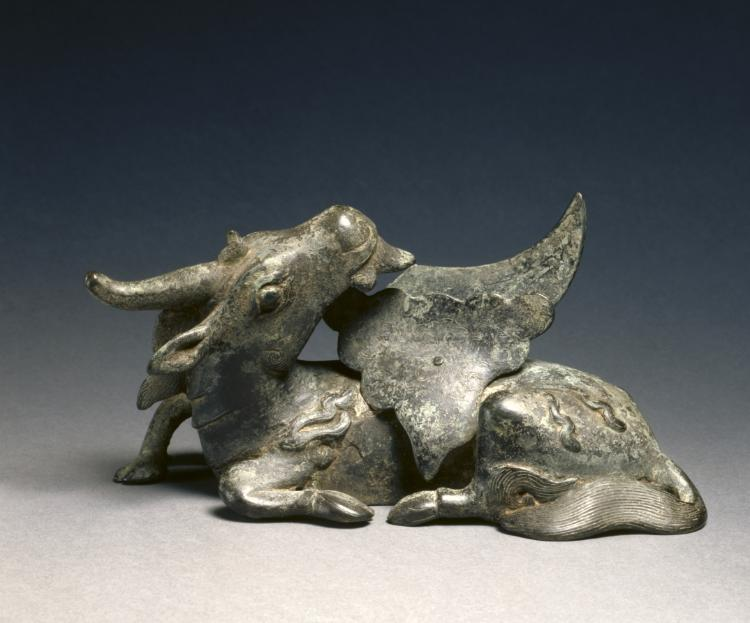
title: Mirror Stand in the Shape of a Djeiran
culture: China, Qing dynasty (1644-1911)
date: mid 1600s-early 1900s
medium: bronze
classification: Metalwork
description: This mirror stand is the in shape of a recumbent djeiran, or Central Asian antelope. Commonly appearing on Sogdian silver from the 600s onward, the djeiran motif migrated via the trade routes to northern China. There, during the Jin and Yuan (1279–1368) dynasties, it was very popular and always depicted with the moon supported by clouds. Chinese writers often identify the djeiran as the mythical rhinoceros (xi'niu) that is said to gaze at the moon, or as the cow of Wu "panting upon seeing the moon." When the stand originally held a mirror, the animal would appear to be looking at the moon.